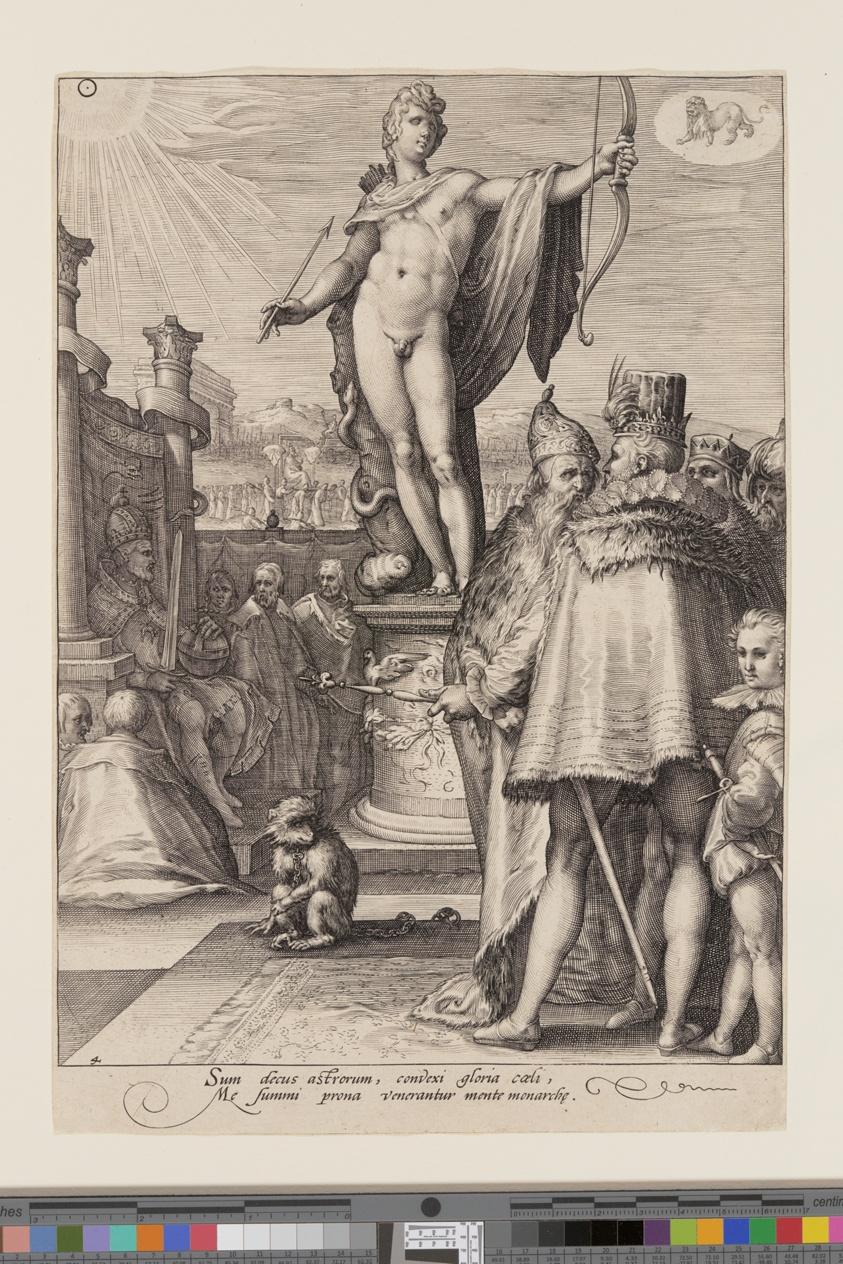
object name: Print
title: Apollo Presiding over the Arts of Government, from Seven Planetary Gods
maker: Jan Saenredam (Dutch, 1565–1607); after Hendrick Goltzius (Dutch, 1558–1617)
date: 1596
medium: Engraving on ivory laid paper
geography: Netherlands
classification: engraving; paper; print; prints and drawing